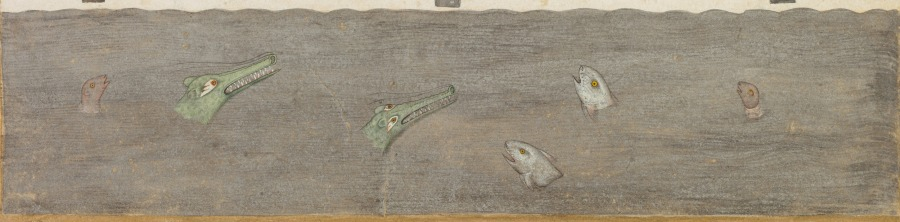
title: Mahliqa, Daughter of the Emperor of China, Pointing at the Bird-Man Khwaja Mubarak: A Leaf from a Poetical Romance Relating to Shah Alam I (recto)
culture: Mughal India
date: c. 1710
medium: Gum tempera and gold on paper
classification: Painting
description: A Persian inscription identifies the bird-man in the tree by name, but the text in which he appears remains unidentified. Also unknown is the Chinese princess Mahliqa (“she who has a face like the moon”), named in a Persian inscription written in front of her face. The artist depicts her in the dress of a Mughal court lady, except for the addition of an unusual headdress, and her handmaidens all look Indian. They gesture to the bird-man from the opposite side of a formal garden canal with fountains. A fortified city lies in the distance behind the walled garden, while creatures peer up at the fabulous composite figure from the water below.